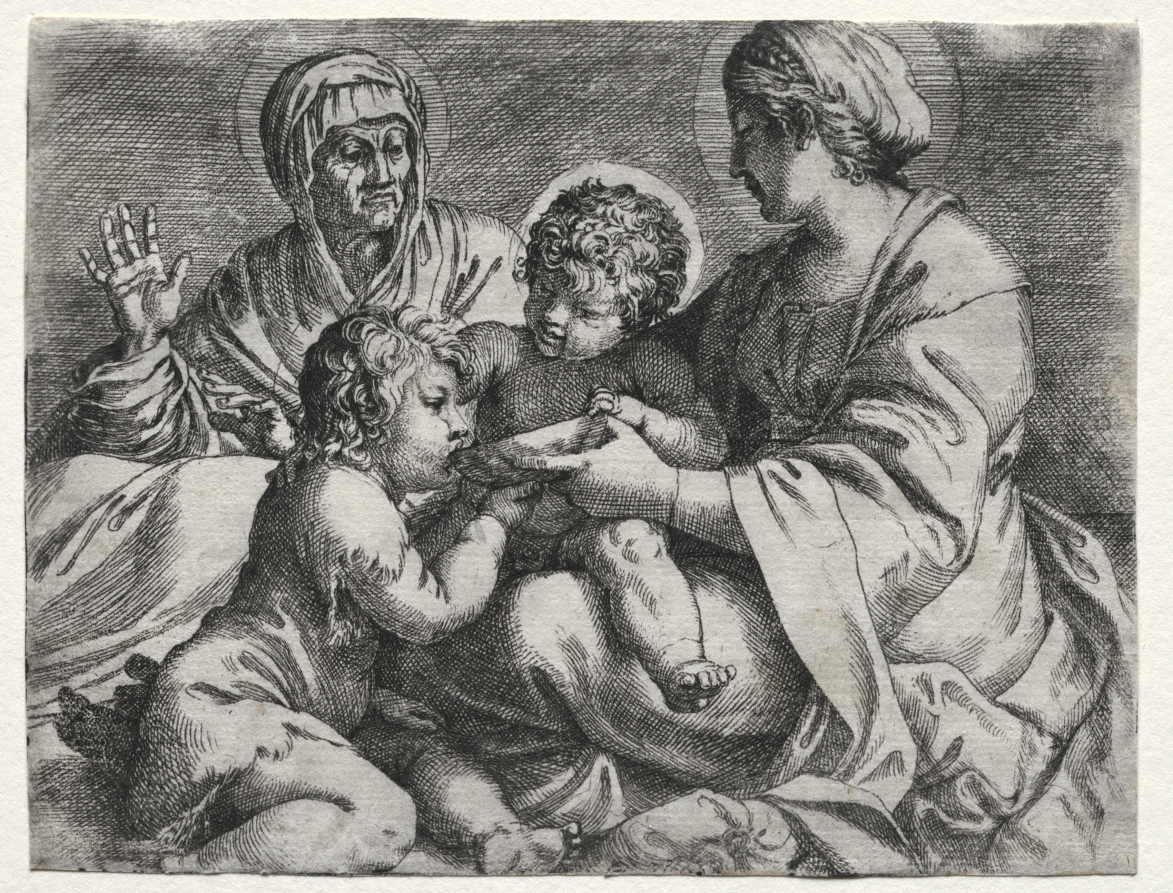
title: Virgin with the Bowl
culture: Italy, 16th century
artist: Annibale Carracci (Italian, c. 1560–1609)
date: 1606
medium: engraving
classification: Print